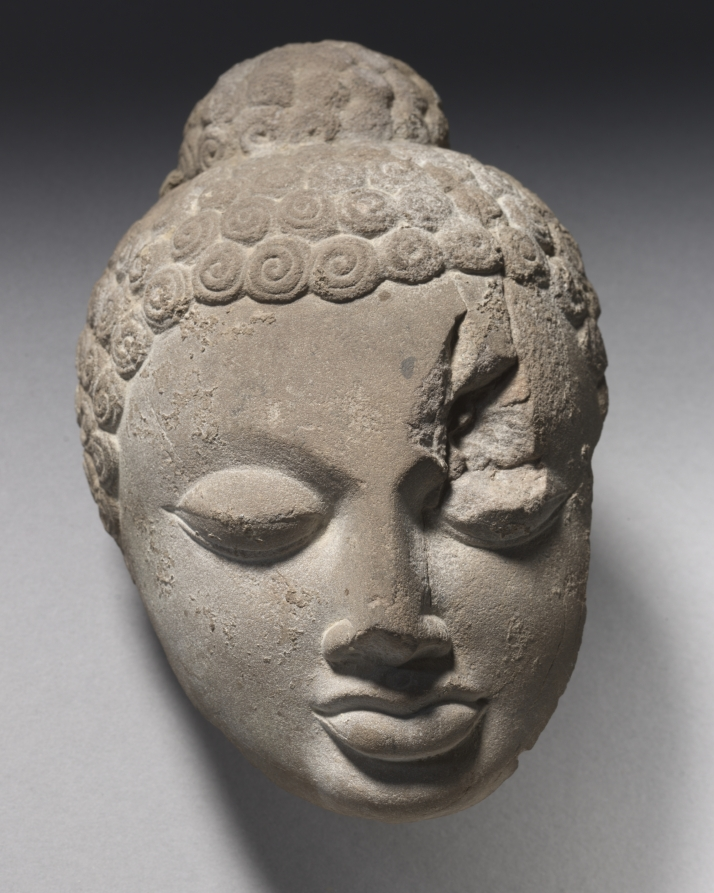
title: Fragment of Head of Buddha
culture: India, Sarnath, Gupta Period (320-647)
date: 400s CE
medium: sandstone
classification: Sculpture